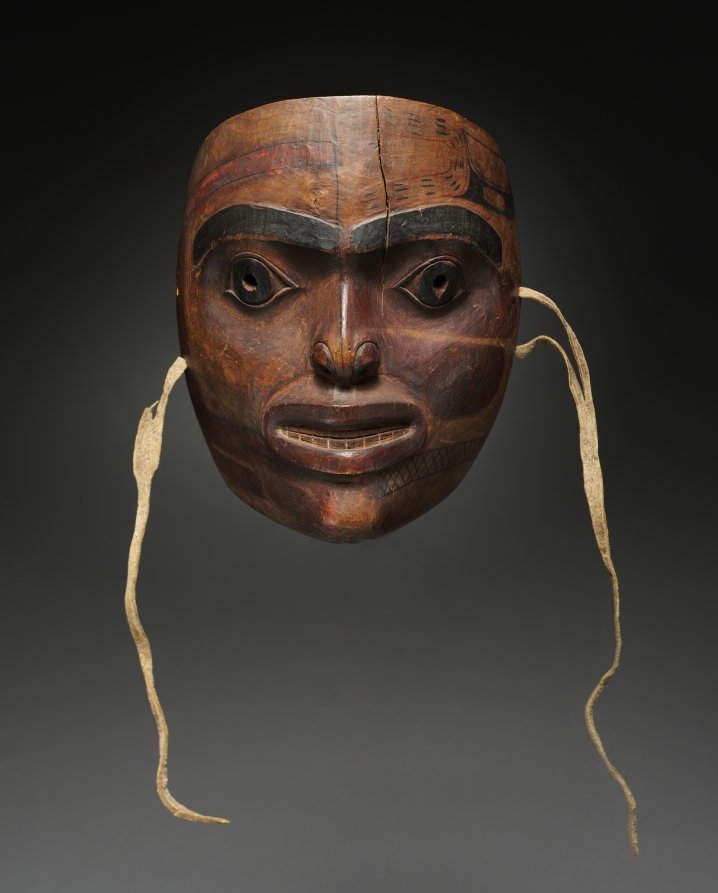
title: Mask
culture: Native North America, Northwest Coast, Alaska, Tlingit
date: late 1800s–early 1900s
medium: wood (alder), pigment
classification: Sculpture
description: In 1998, Robert Joseph, a Northwest Coast chief, recalled that when he donned ceremonial dance masks as a youth, "all the world is somewhere else . . . I am the mask . . . the bird . . . the animal . . . the spirit. I transcend into the being of the mask." Although this mask's identity is lost, it may represent a mythic ancestor of a Tlingit family and perhaps was worn during a winter ceremony.